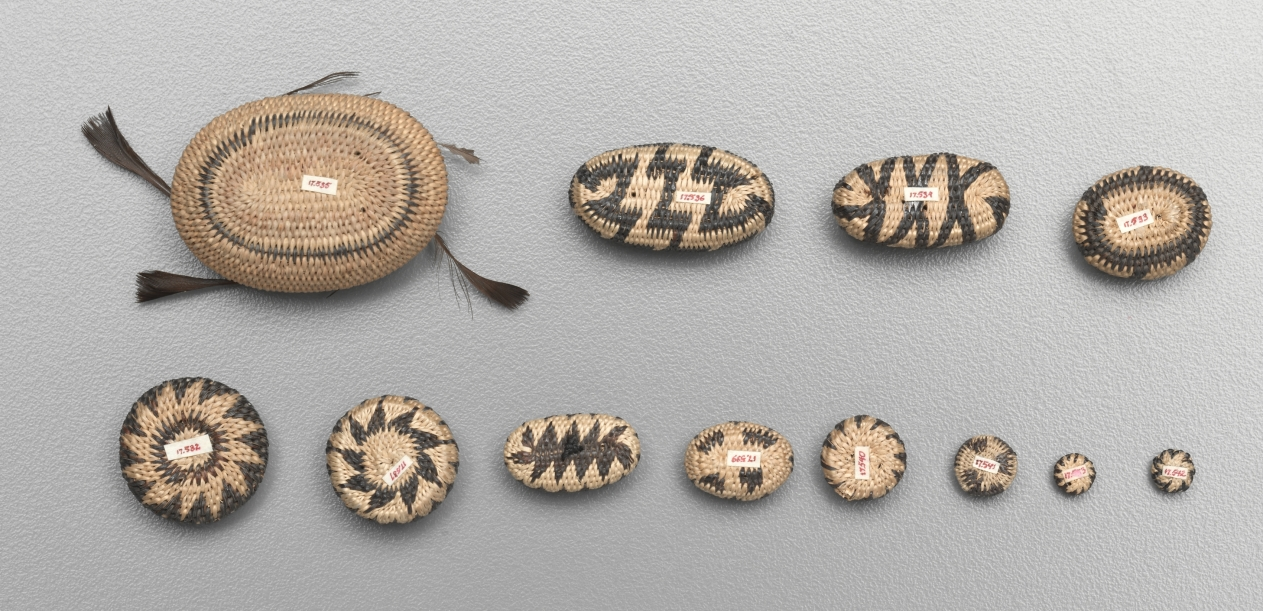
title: Miniature Oval Basket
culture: California, Pomo, 20th century (?)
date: Early 1900s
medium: coiled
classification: Basketry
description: Miniature baskets were made to demonstrate the basket-maker’s virtuoso skill, and these tiny marvels seem to be no exception—the smallest are just a few millimeters wide but still patterned. For such fine work, dexterity was required as much for preparation of materials as for weaving.